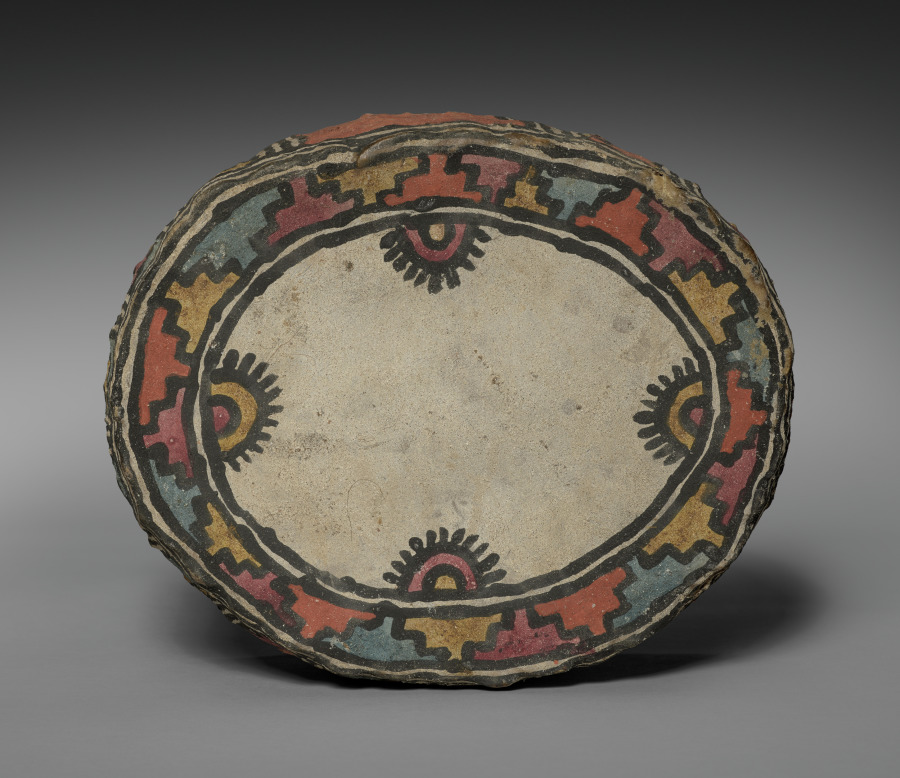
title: Painted Drum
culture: Central Andes, Middle Horizon, North Coast?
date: 500–1000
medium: Animal hide, gesso, wooden slats, pigment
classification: Musical Instrument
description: In the 1600s, music was so important to Indigenous Andean ceremonial life that Spaniards destroyed thousands of musical instruments to hasten Natives’ conversion to Christianity. The number of surviving, older instruments suggests that music had similar import in earlier periods. This rare example is painted with a figure wearing a crescent headdress, an emblem of status; it may have been played by a woman.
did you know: This painted drum may have been played by a woman in antiquity.